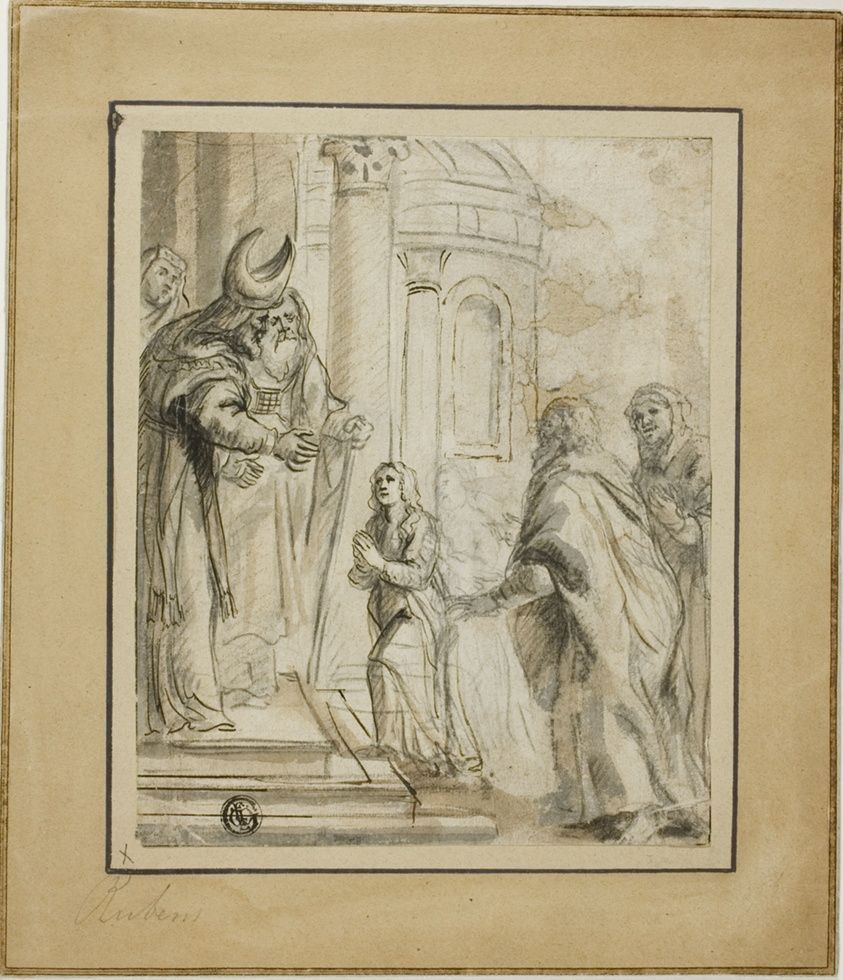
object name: Drawing and Watercolor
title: Presentation of the Virgin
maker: School of Peter Paul Rubens (Flemish, 1577-1640)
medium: Pen and brown ink and black chalk, with brush and gray and brown wash, on ivory wove paper, laid down on tan wove paper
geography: Flanders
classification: pen and ink drawings; drawings (visual works); prints and drawing